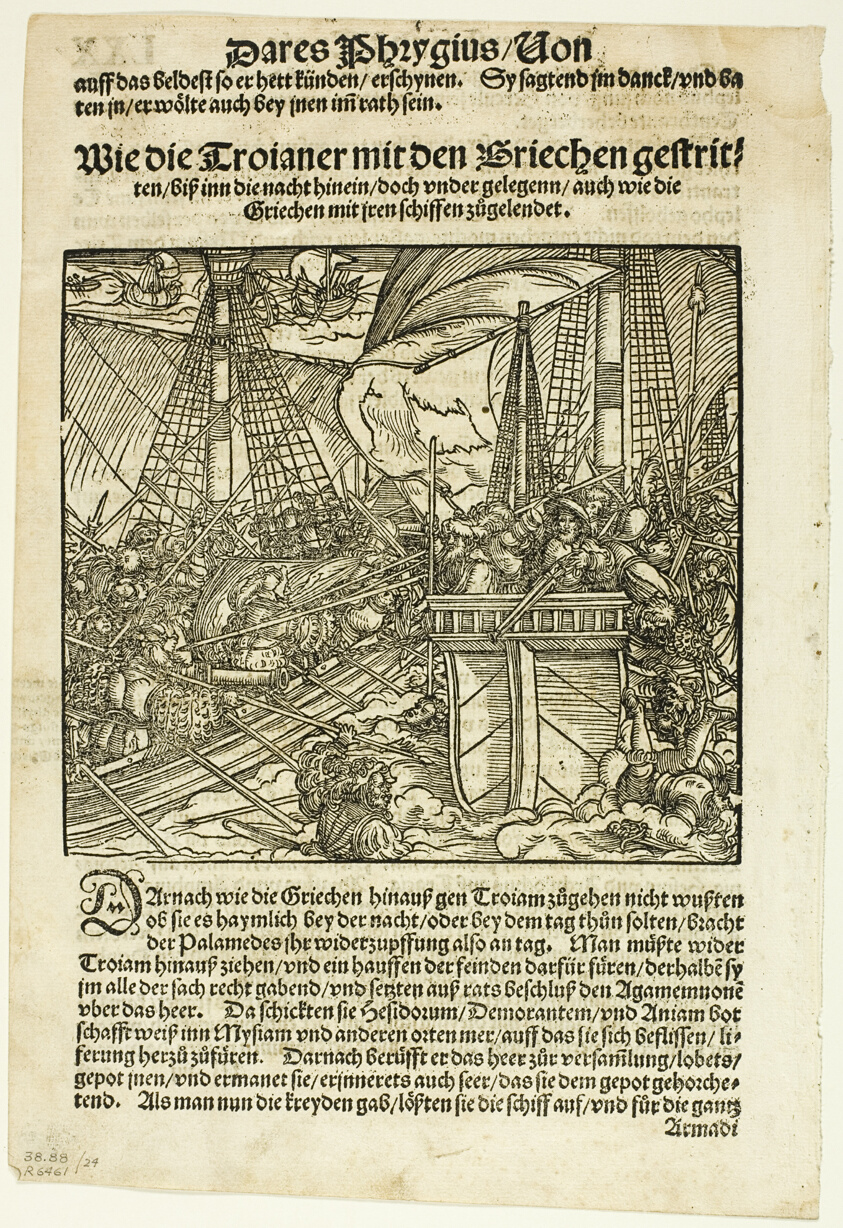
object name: Print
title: Illustration from Von dem Troianischen Krieg, plate 24 from Woodcuts from Books of the XVI Century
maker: Hans Weiditz II (Master of Petrarch) (German, c.1495-1536); assembled by Max Geisberg (Swiss, 1875-1943)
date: 1536, assembled into portfolio 1937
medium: Woodcut on paper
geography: Germany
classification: woodcut; print; prints and drawing